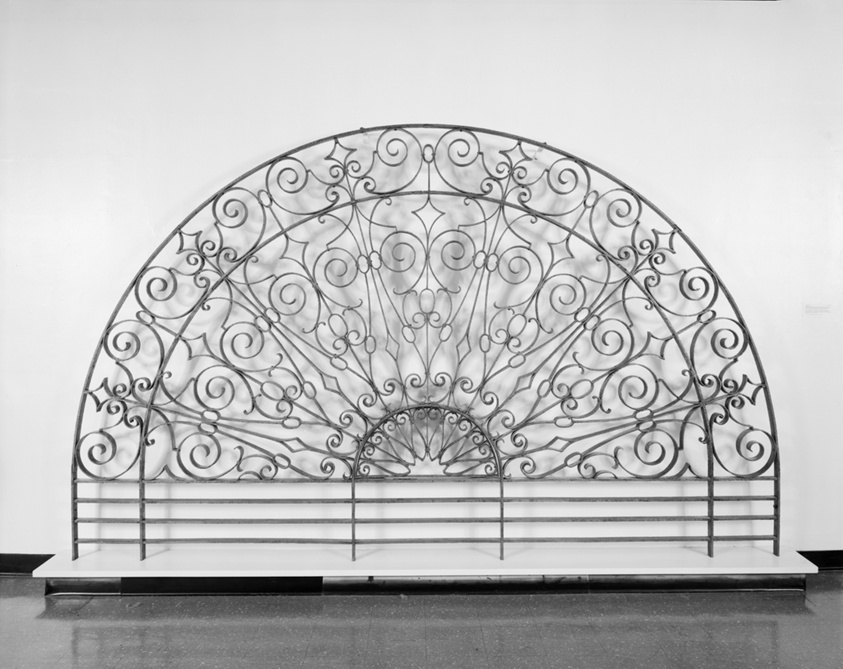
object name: Architectural fragment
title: Lunette from the Commerce Building, Chicago, Illinois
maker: Burnham & Root; American, 1873-1891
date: 1885/86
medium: Wrought iron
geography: United States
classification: architectural fragment; architecture